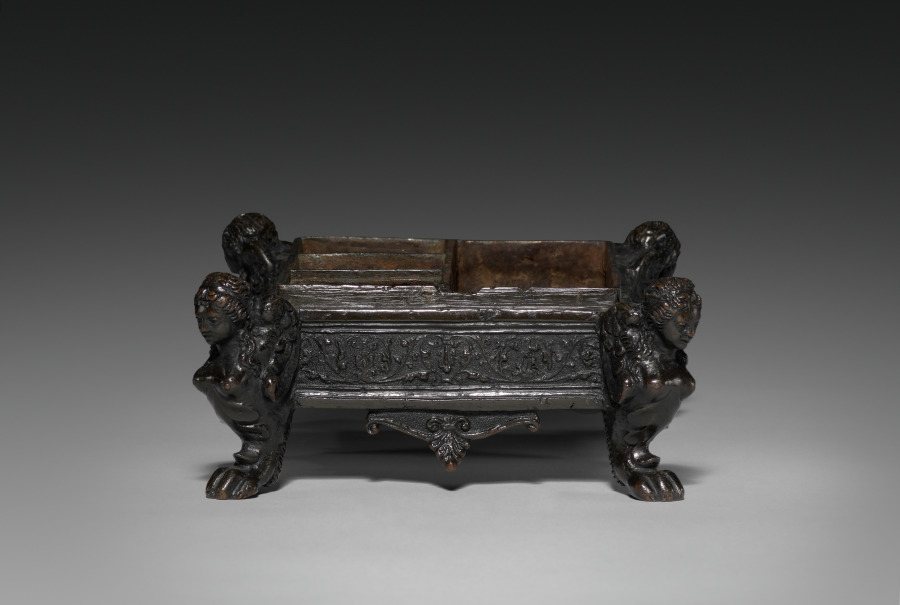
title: Writing Casket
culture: Italy, Ravenna, 16th century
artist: workshop of Severo da Ravenna (Italian, c.1496–c.1543)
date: c. 1525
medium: bronze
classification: Sculpture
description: The interior is divided into four compartments for storing writing implements and sand for blotting.